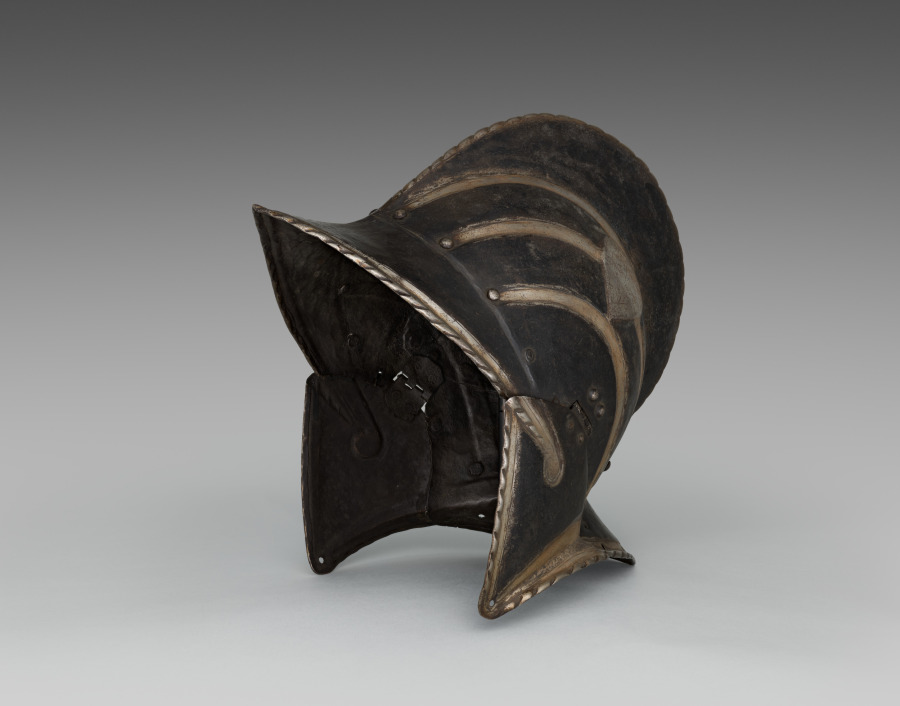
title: Black and White Burgonet (of the Civic Guard of Bologna)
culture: Italy, late 16th Century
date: c. 1580–1600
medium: steel with black paint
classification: Arms and Armor